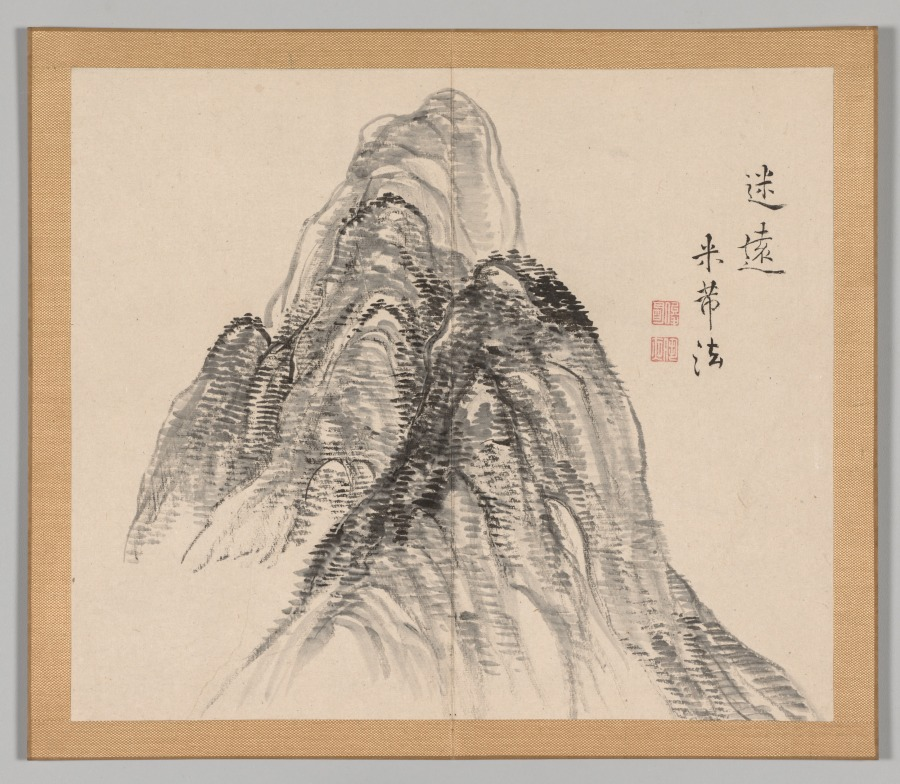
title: Reverberations of Taiga, Volume 2 (leaf 3)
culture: Japan, Edo period (1615–1868)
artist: Aoki Shukuya (Japanese, d. 1802)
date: mid- to late 1700s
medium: double-leaf from a pair of albums; ink and light color on paper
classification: Portfolio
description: Traditionally, young painters in Japan began their studies with an established master-painter. The master's compositions invariably became models that the apprentice copied to learn various ink and brush techniques. Shukuya was a pupil of the famous Kyoto artist Ikeno Taiga, whose style is reflected in these sketches of rocks, trees, and mountains.